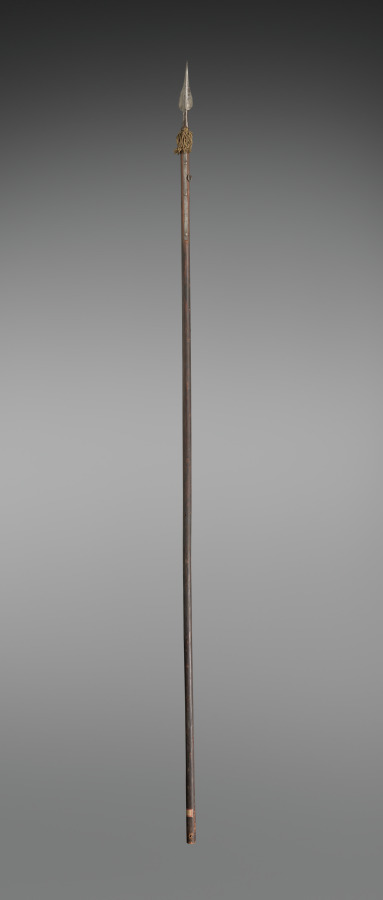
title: Banner with Medallions of Christ's Passion (pole)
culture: Spain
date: 1700s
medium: wood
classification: Arms and Armor